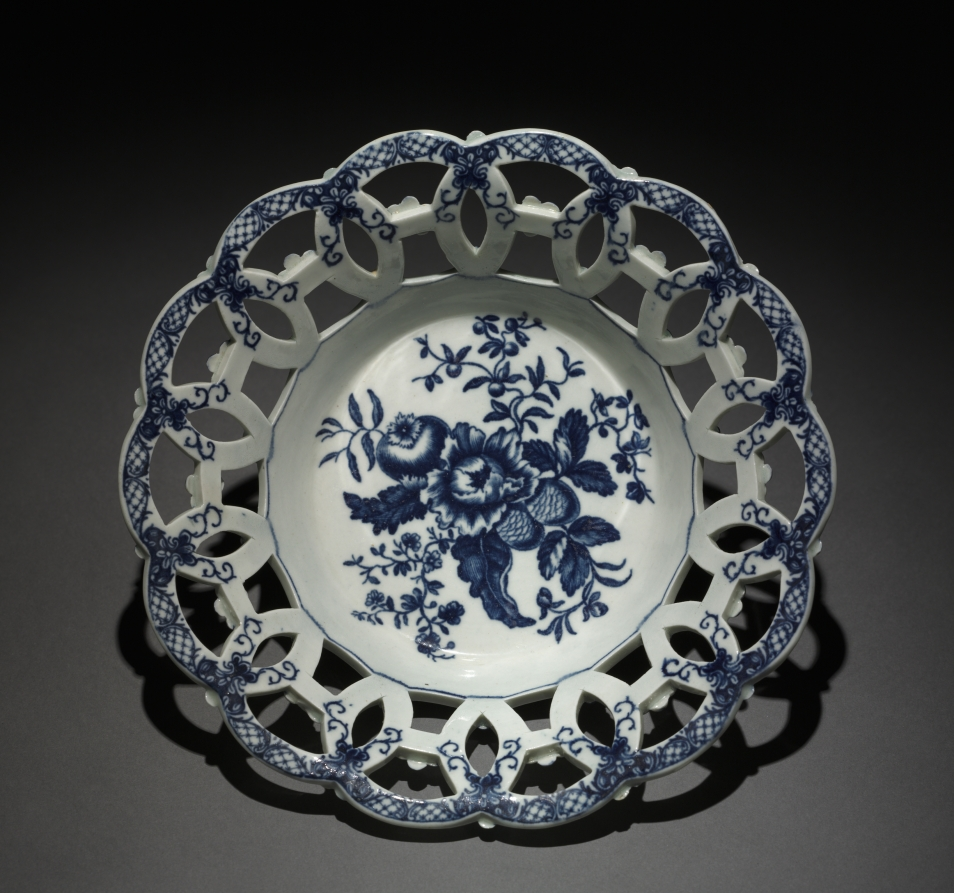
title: Fruit Bowl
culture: England, Worcester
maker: Worcester Porcelain Factory (British, established 1751)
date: c. 1750–70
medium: porcelain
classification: Ceramic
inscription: Blue half moon mark on bottom